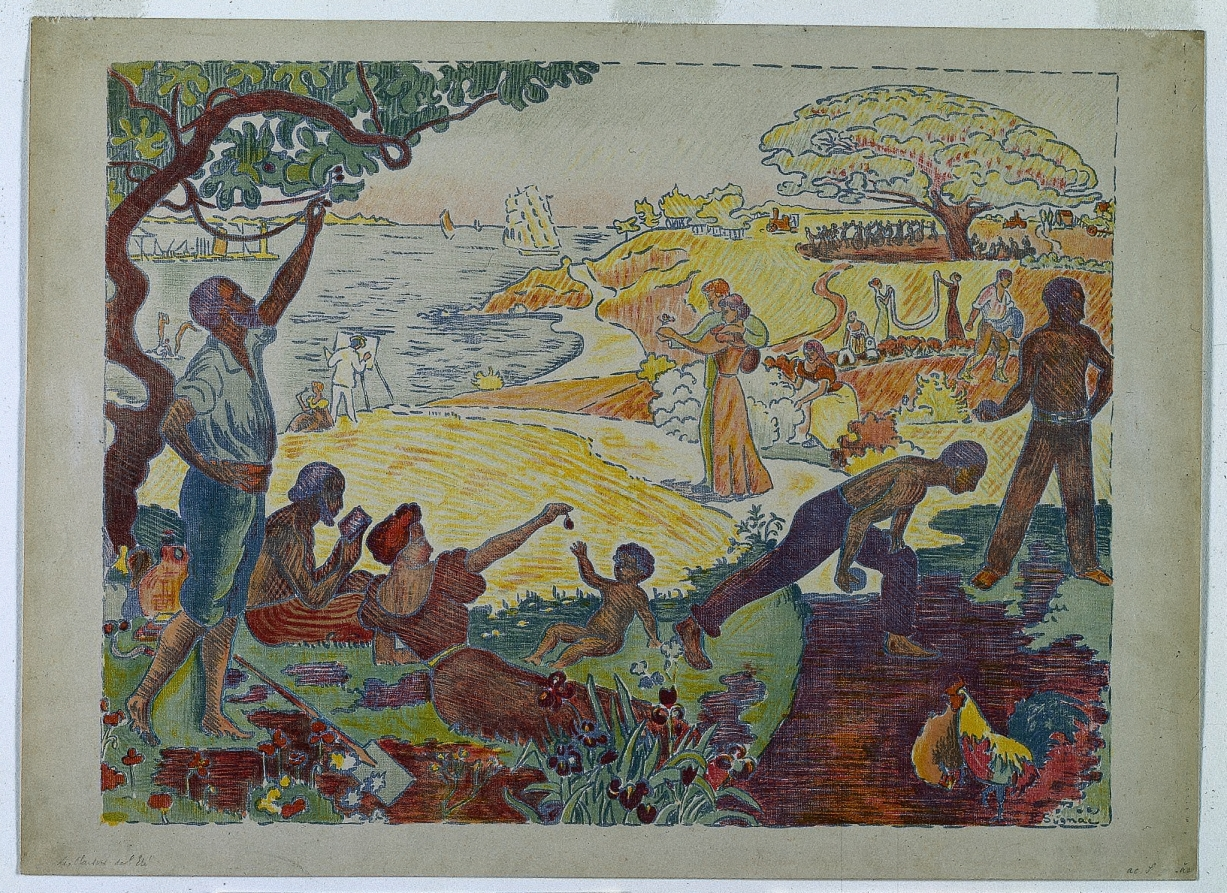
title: Harmonious Times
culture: France, late 19th Century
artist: Paul Signac (French, 1863–1935)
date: 1895–1896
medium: color lithograph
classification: Print